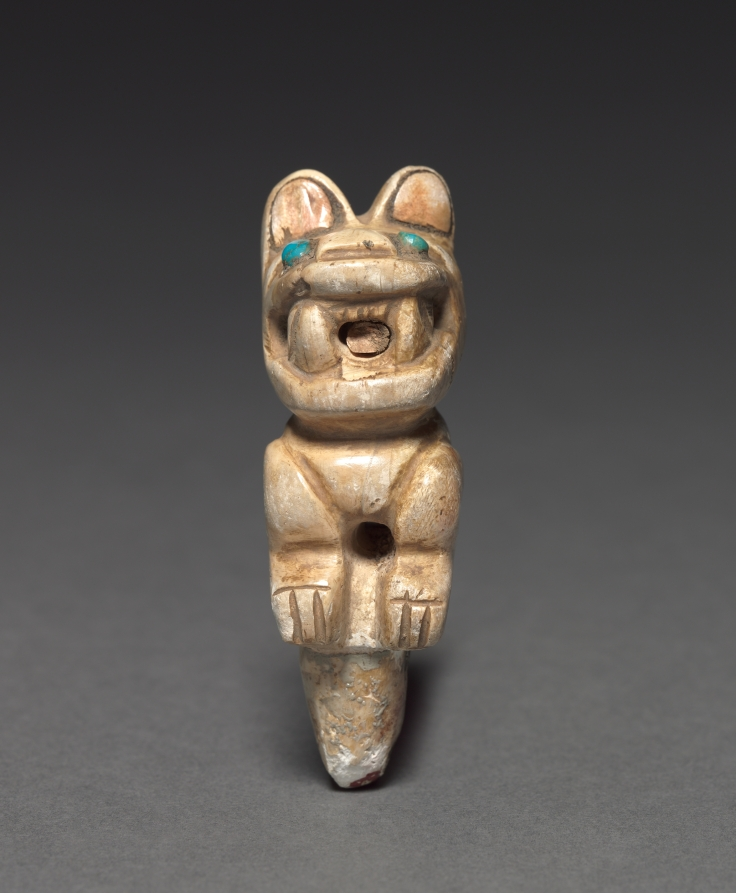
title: Crouching Feline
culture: Peru, Wari (?), 6th-10th Century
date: c. 500–900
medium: stone, turquoise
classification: Jewelry